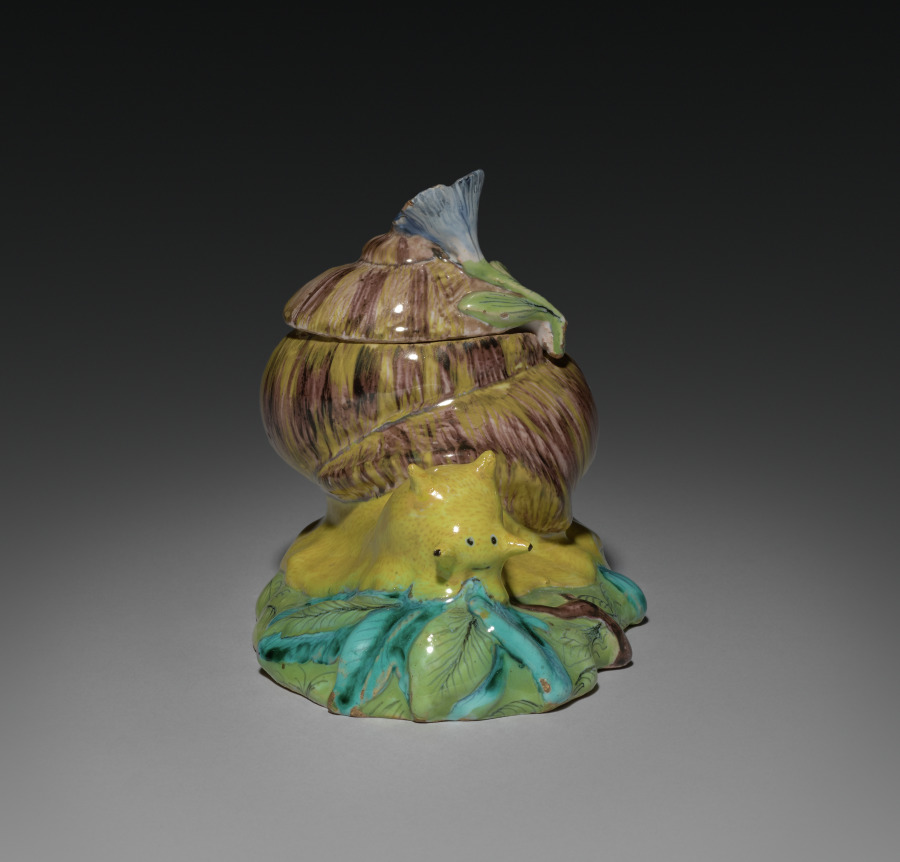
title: Covered Box in the Form of a Snail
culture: France, 18th century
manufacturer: Strasbourg Factory (France)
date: c. 1750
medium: faience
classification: Ceramic